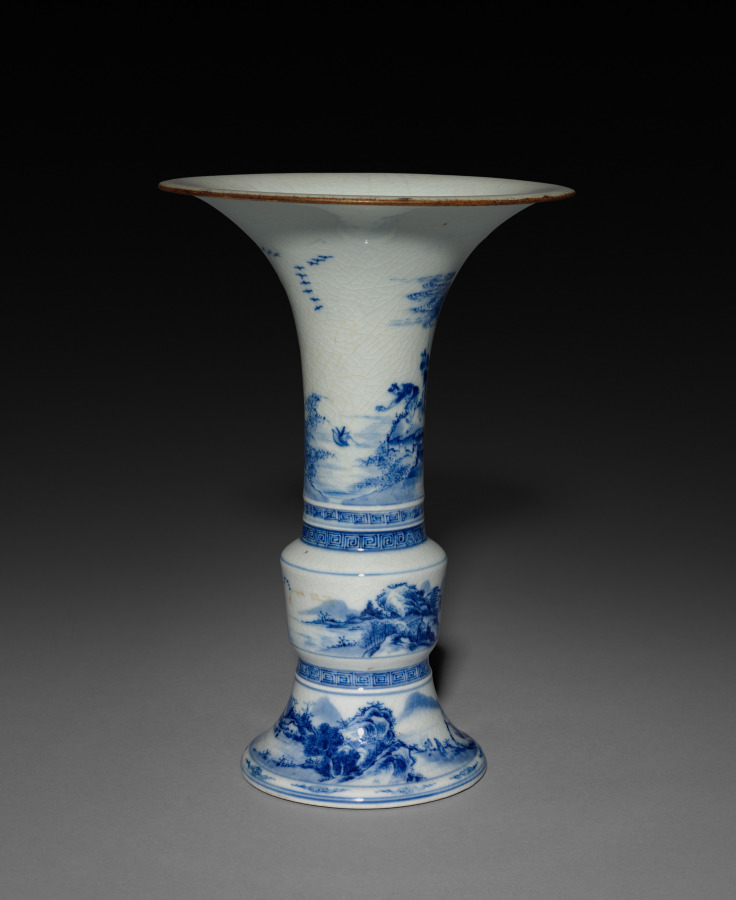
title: Beaker Vase in Form of Archaic Gu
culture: China, Jiangxi province, Jingdezhen kilns, Qing dynasty (1644-1911), Yongzheng reign (1723-35)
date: 1723–35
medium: porcelain with underglaze blue decoration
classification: Ceramic